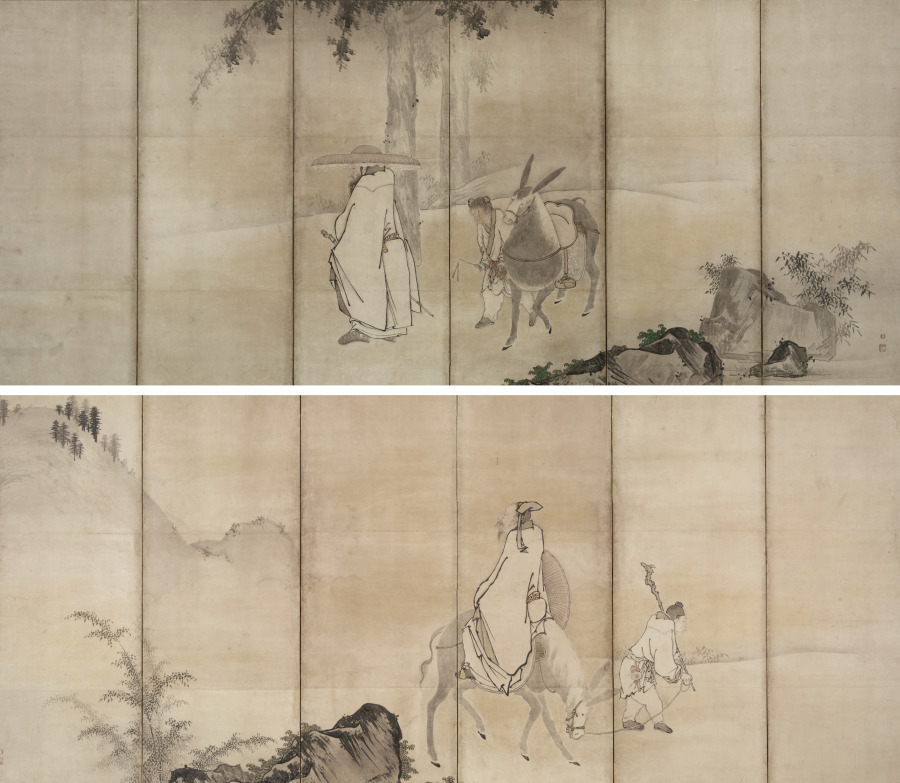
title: Su Shi (So Shoku) and Pan Lang (Han Rō)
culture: Japan, Momoyama period (1573–1615)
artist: Unkoku Tōgan (Japanese, 1547–1618)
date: early 1600s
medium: pair of six-panel folding screens; ink, light color, and gold on paper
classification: Painting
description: This pair of screens depicts episodes from the stories of famed Song-dynasty poets Su Shi of the 1000s and Zhou-dynasty official Pan Lang of the 900s. Both men were banished by their rulers for their perceived missteps. Su Shi’s comments on a series of economic reforms were seen as criticism of the emperor. Pan Lang composed an ill-advised verse about one of the king’s horses. In the left screen Pan rides backward on his donkey as he returns from exile so that he may have a last look at his now beloved Mount Hua. Su Shi, in the right screen, is shown embarking on his journey into exile. The artist of these screens, Unkoku Tōgan, was the founder of the Unkoku school of painting, which emulated the style of renowned ink painter Sesshū Tōyō (1420–1506). Tōgan was the official painter of the Mori family of what is now Yamaguchi prefecture in the south of Japan.